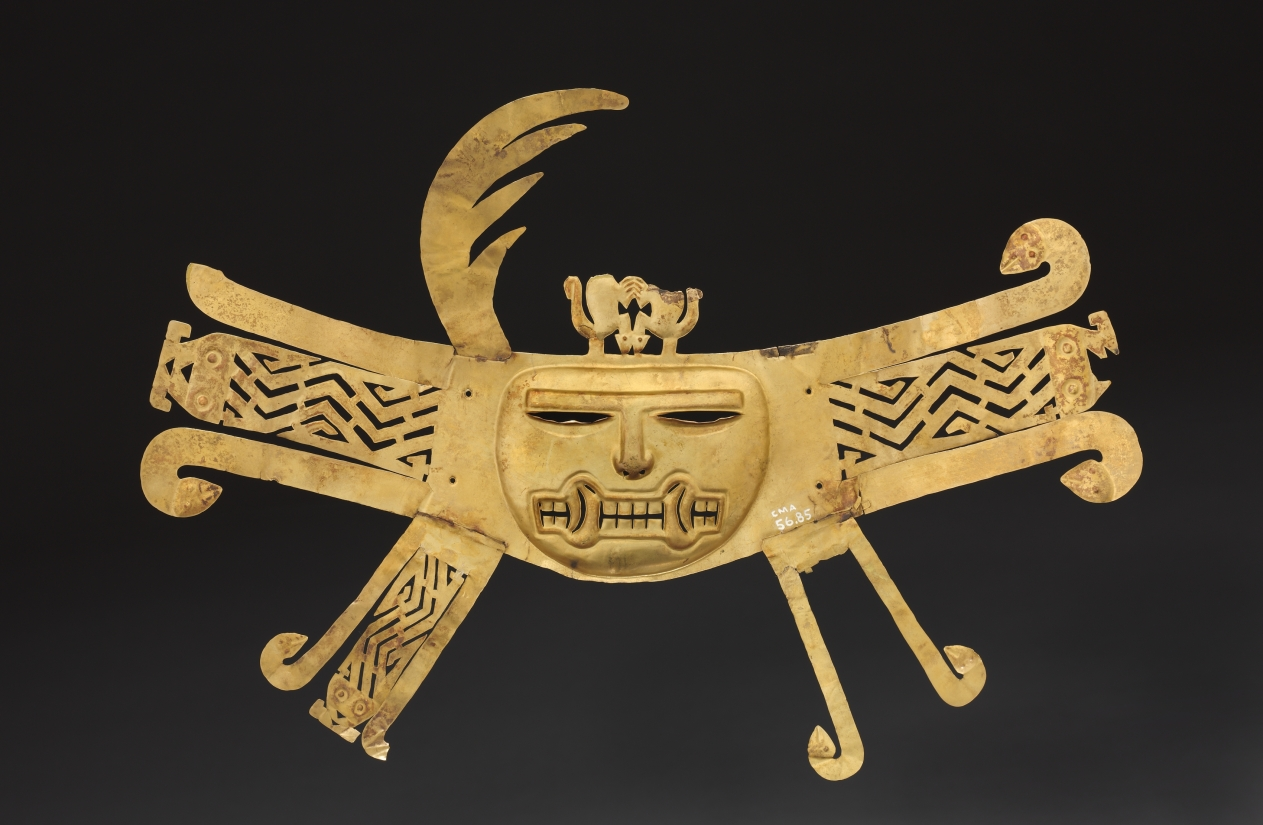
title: Mask Ornament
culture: Peru, Moche or Recuay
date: 1–550 CE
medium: cut and hammered gold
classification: Metalwork